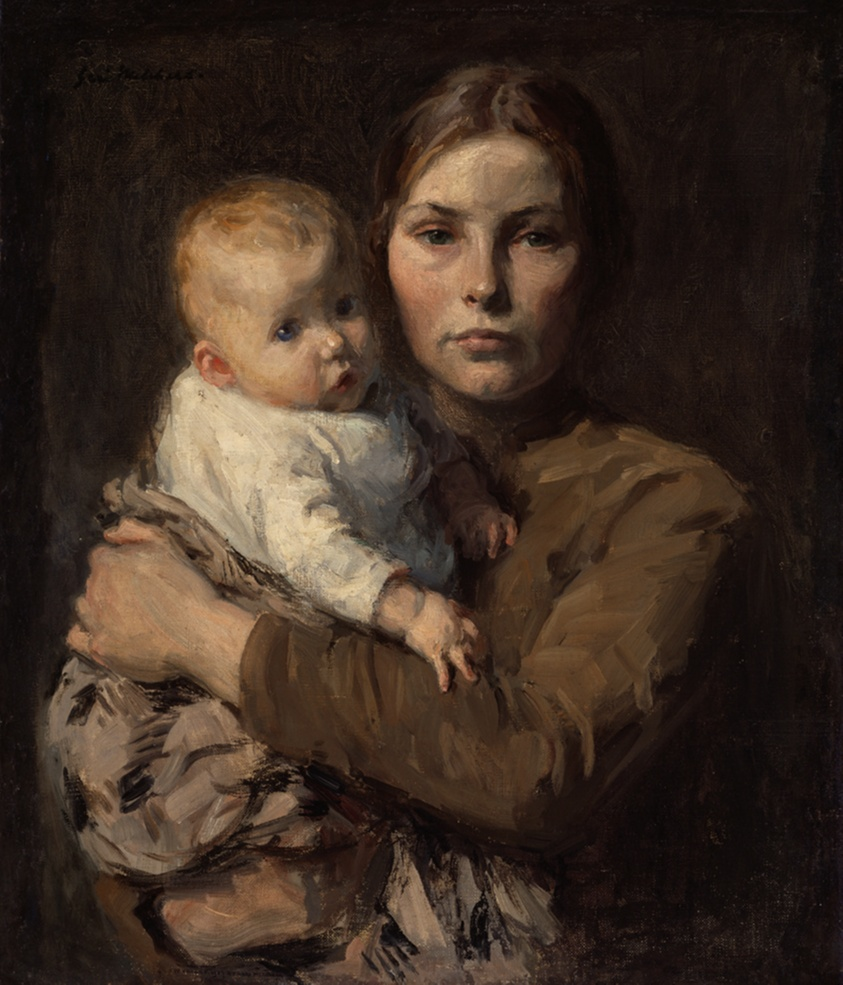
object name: Painting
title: Mother and Child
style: Realism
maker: Julius Gari Melchers (American, 1860–1932)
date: c. 1906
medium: Oil on canvas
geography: Netherlands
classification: painting; modern and contemporary art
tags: Century of Progress, mothers, children, babies, world's fairs, Chicago World's Fairs, people, portraits